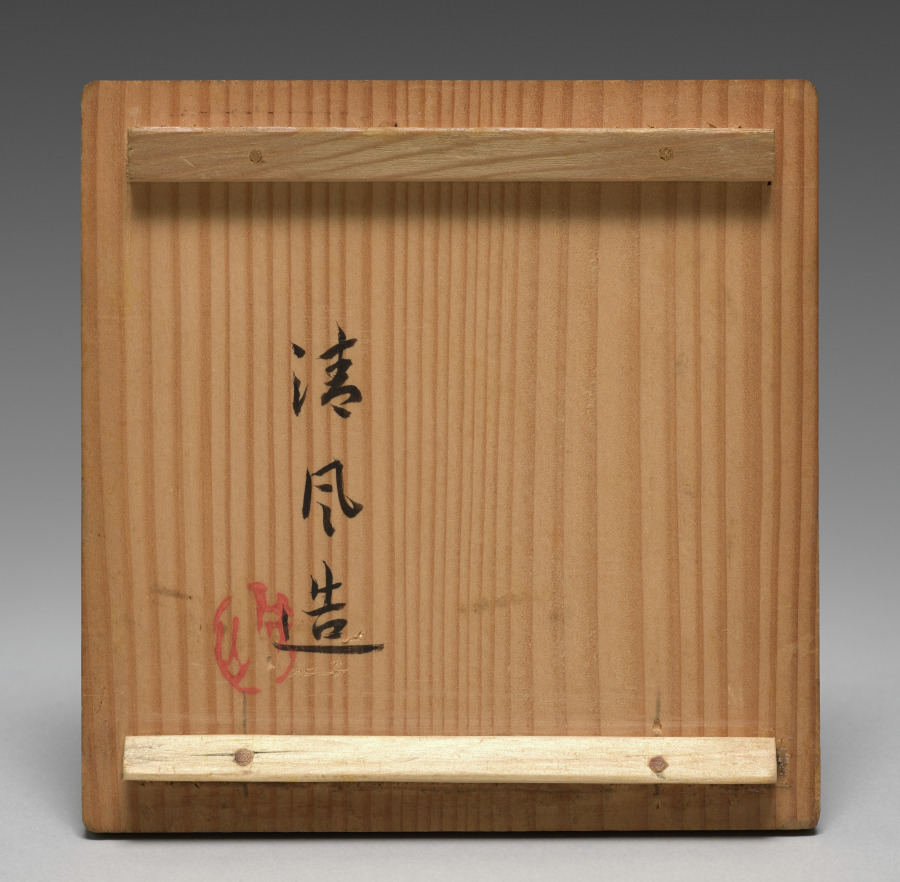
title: Cups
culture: Japan, Taishō period (1912–26) or Shōwa period (1926–89)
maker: Seifū Yohei IV (Japanese, 1872–1951)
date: 1914–46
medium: Set of five cups; porcelain with yellow glaze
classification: Ceramic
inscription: 清風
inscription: 清風造 【印】成山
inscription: 清風盧人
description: Like his father, Yohei IV also produced works with red or yellow monochrome glazes. His yellow-glazed works include this set of five drinking cups, a pair of sake pourers CMA 2022.216, and a sweets bowl molded into the shape of a chrysanthemum CMA 2022.218.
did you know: Seifū Yohei IV learned the ceramics industry from his father and painting from Tanomura Shosai.